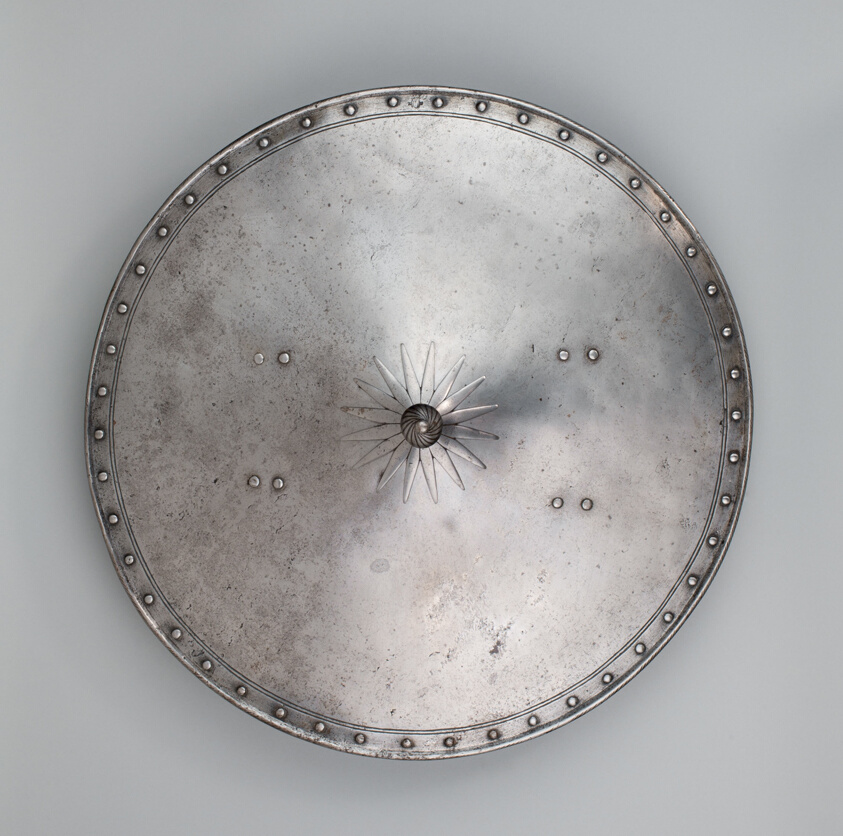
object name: Armor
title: Round Shield (Rondache)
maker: Pierre du Coudroy (Flemish, born France, 1560-about 1626); Brussels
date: about 1625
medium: Steel and iron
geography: Western Europe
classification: shield; armor; arms and armor